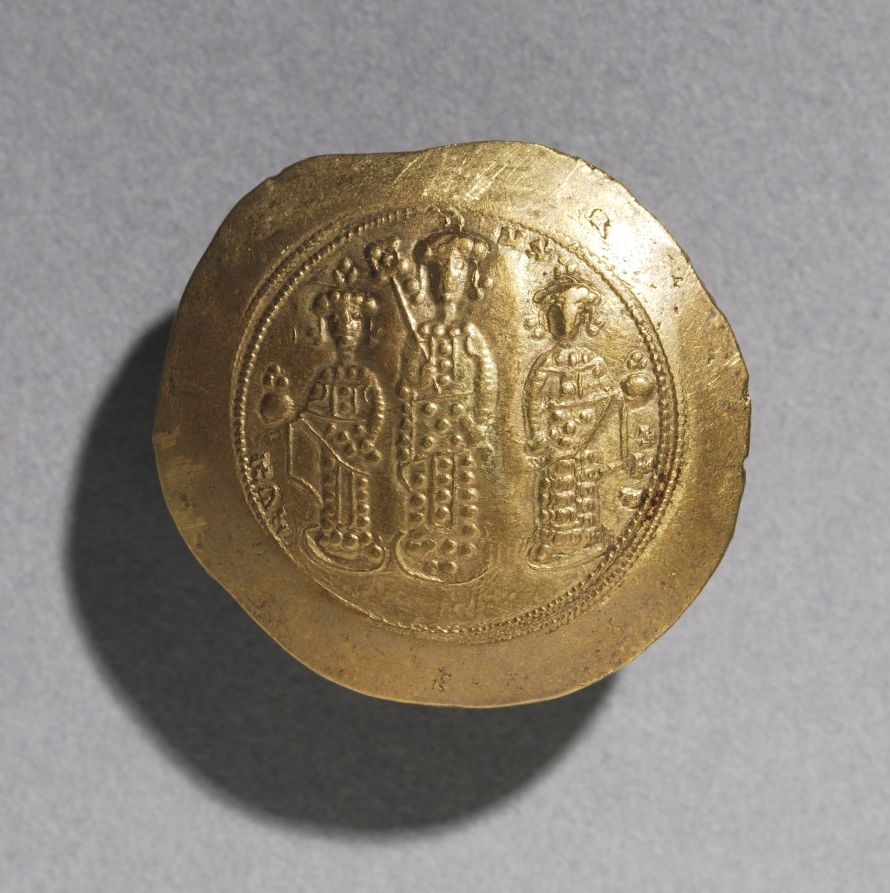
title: Nomisma with Eudocia and Romanus IV Diogenes (reverse)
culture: Byzantium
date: 1068–1071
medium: gold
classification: Coins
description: Byzantine Gold Coins The vast number of surviving Byzantine coins attests to the level of trade across the empire. Controlled and supervised by the emperor, the producers of coins took care to represent his authority and reflect his stature. Talented artists were recruited to engrave the dies (molds) used for the striking of coins. Emperors increasingly came to include their heirs and co-emperors on their coinage, as well as other family members or even earlier rulers. Coins were recognized, then as now, as small, portable works of art. With their inscriptions and images, Byzantine coins provide valuable documentation of historical events and a record of the physical appearance of the emperors. The coins shown here include the solidus, the basic gold coin of 24 karats; the tremissis, a gold coin of one-third the weight and value of the solidus; and the nomisma, which in the 10th century replaced the solidus as the standard gold coin.